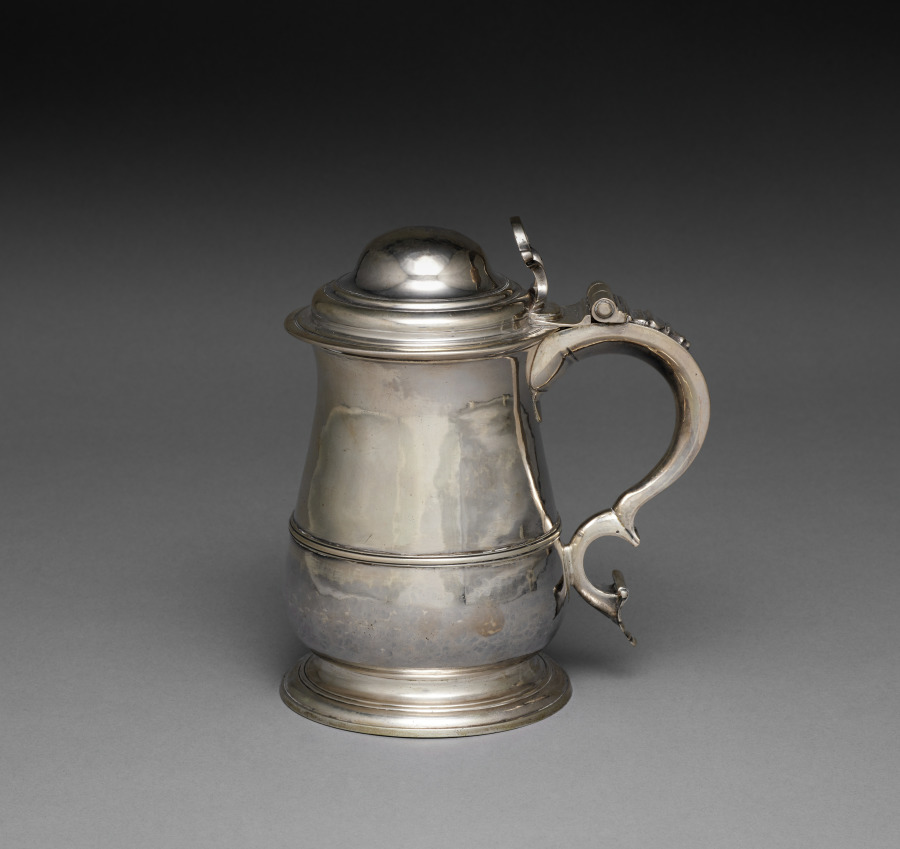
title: Tankard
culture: England, 18th century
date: c. 1760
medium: silver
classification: Silver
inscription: Scratched underside: "11 oz 13 'u 10".